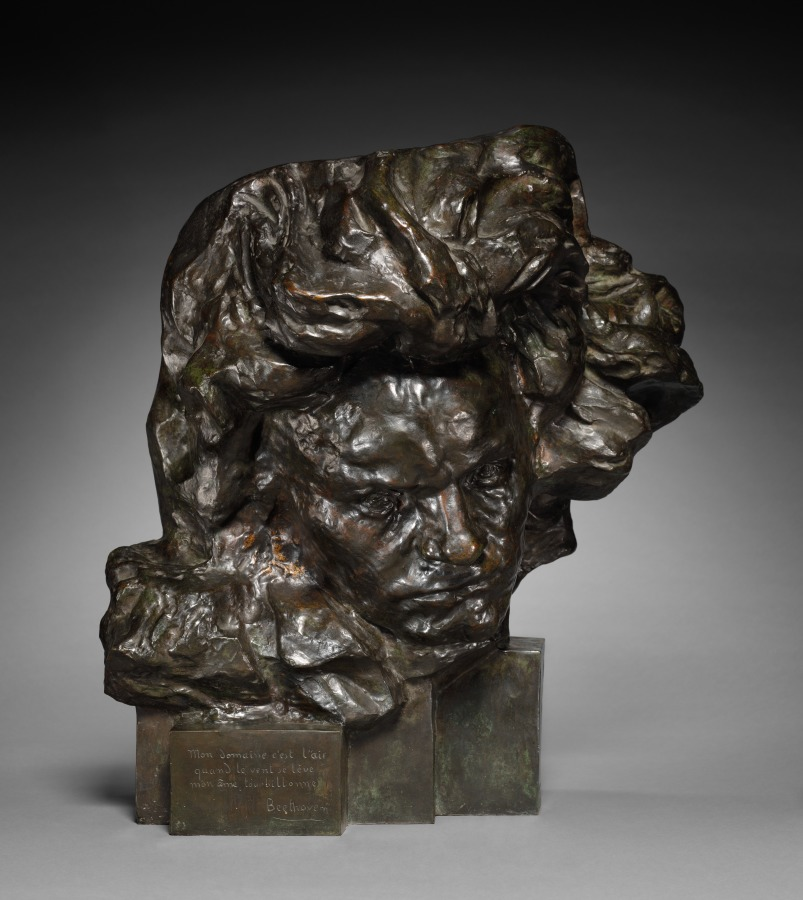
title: Head of Beethoven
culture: France, 19th century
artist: Emile Antoine Bourdelle (French, 1861–1929)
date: 1891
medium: bronze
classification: Sculpture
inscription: Signed left side: "Bourdelle / Sculpt."; inscribed right side: "FONRIENATLE DES BRONZES / J PETERMANN: ST GILLES BRUXELLES"; inscribed on front: "Mon domaine c'est l'air / quand le vent, se leve / mon âme tourbillonne / Beethoven"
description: A pioneer of modern sculpture, Antoine Bourdelle studied at the École des Beaux-Arts in Paris and worked as an assistant to Augustin Rodin, who greatly admired the younger artist’s work. In 1888 Bourdelle produced the first of a series of sculptural portraits of Ludwig van Beethoven, in which the artist orchestrated powerful billowing shapes to convey the creative spirit or genius of the composer. The artist inscribed a quote from Beethoven in the lower left: “My domain is the air; when the wind rises my soul swirls.”